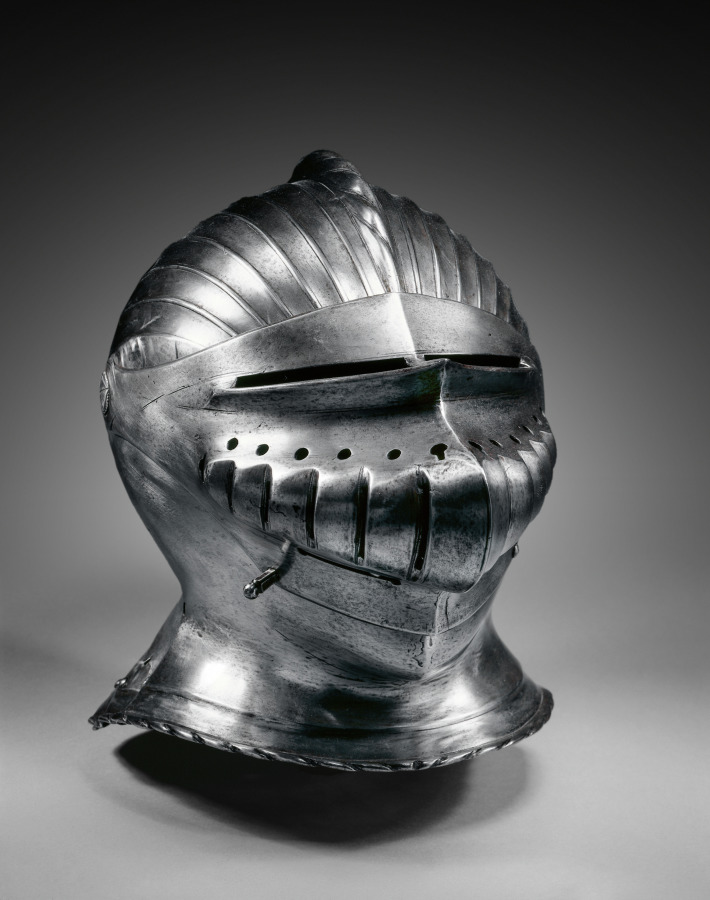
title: Close Helmet in Maximilian Style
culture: Germany, Nuremberg(?), 16th century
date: c. 1510–30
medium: steel, brass rivets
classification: Arms and Armor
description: Distinguished by its regularly fluted surfaces, armor in this style was popularized in South Germany during the early 1500s. The style is usually called "Maximilian," as it was introduced during the reign of Emperor Maximilian I (1493-1519). The style reflects male costume of the period and the shift to the new rounded forms of the Renaissance. Other examples of this armor style may be seen nearby.